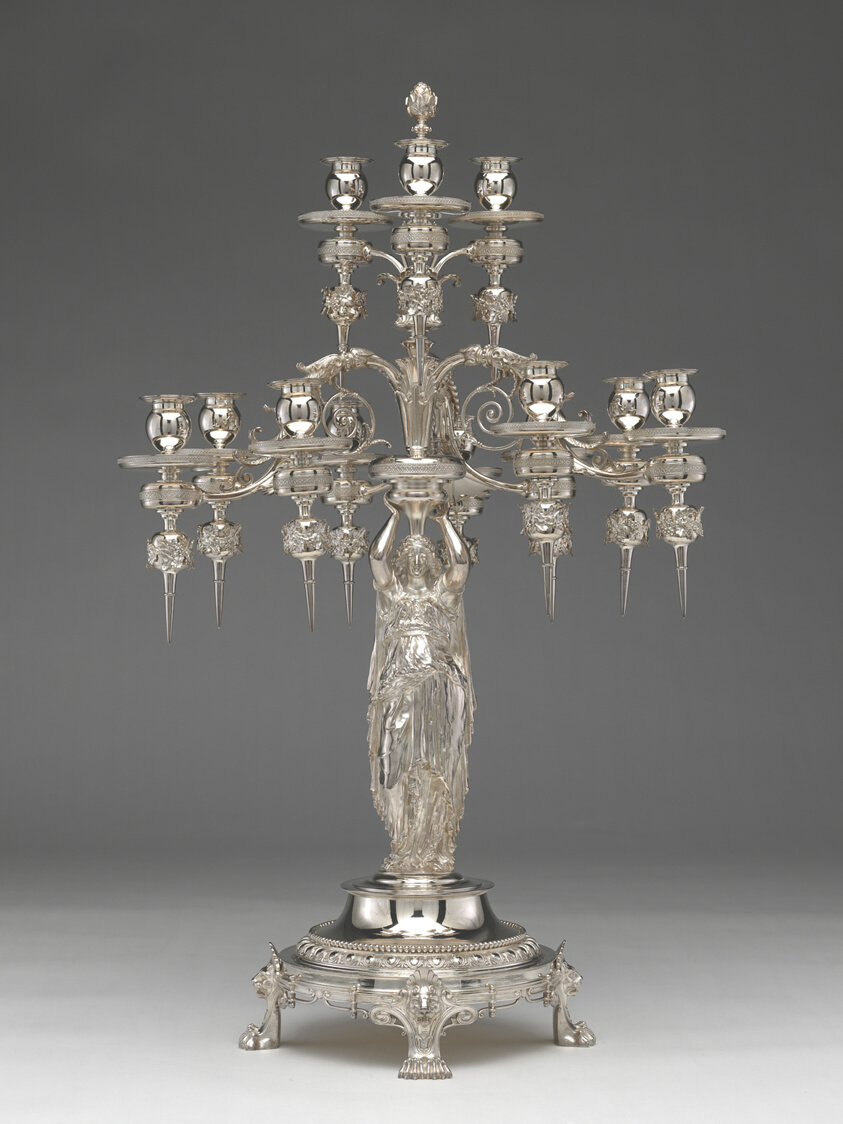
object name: Metalwork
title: Pair of Candelabra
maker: Chased by Eugene J. Soligny (American, c. 1833–1901); Tiffany and Company (American, founded 1837); New York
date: 1873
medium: Silver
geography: United States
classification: candleholder; american arts; american decorative arts; candleholder - candelabra; decorative arts; silver